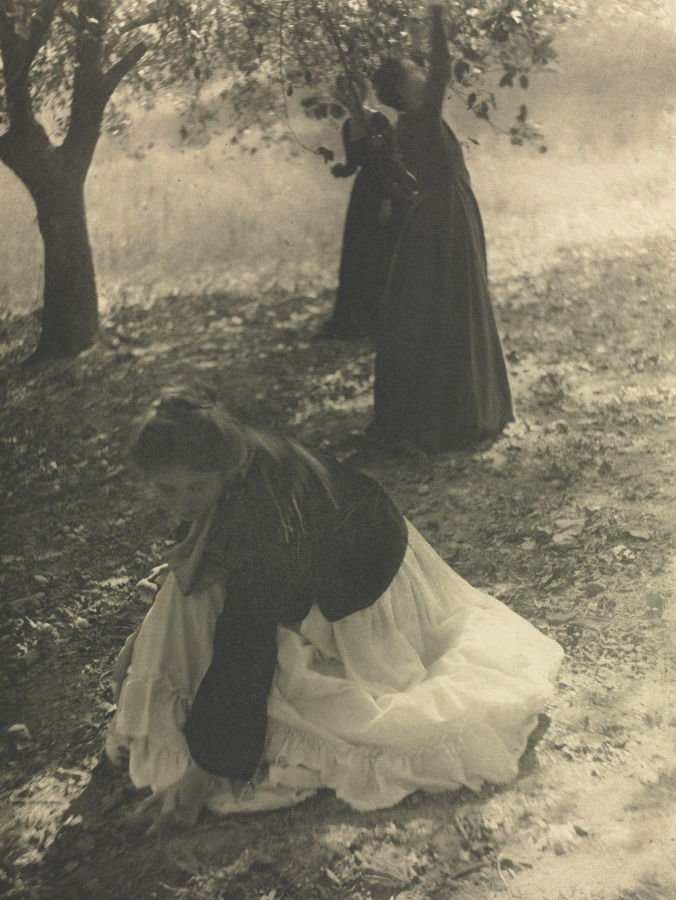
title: Camera Work: The Orchard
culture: America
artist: Clarence H. White (American, 1871–1925)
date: 1905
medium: photogravure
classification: Bound Volume